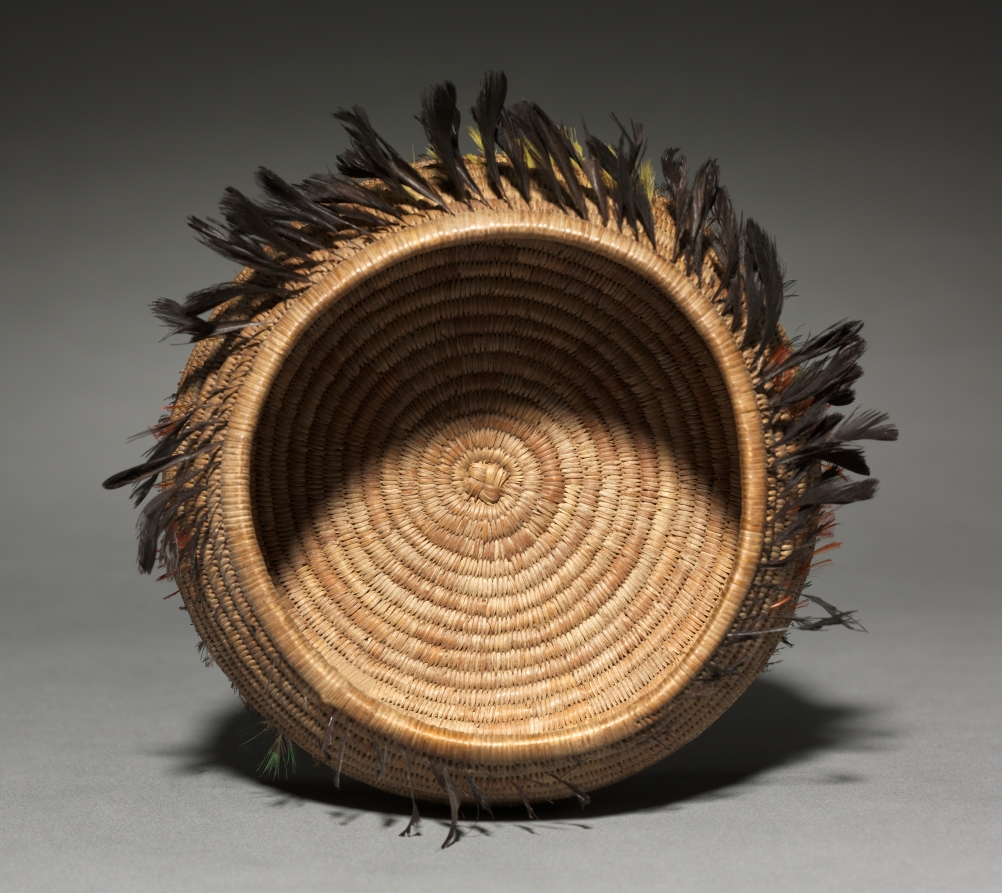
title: Gift Bowl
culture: California, Pomo, Eastern, Late 19th- Early 20th century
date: 1900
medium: Sedgw with Feathers; Coiled (3 rods)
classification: Basketry